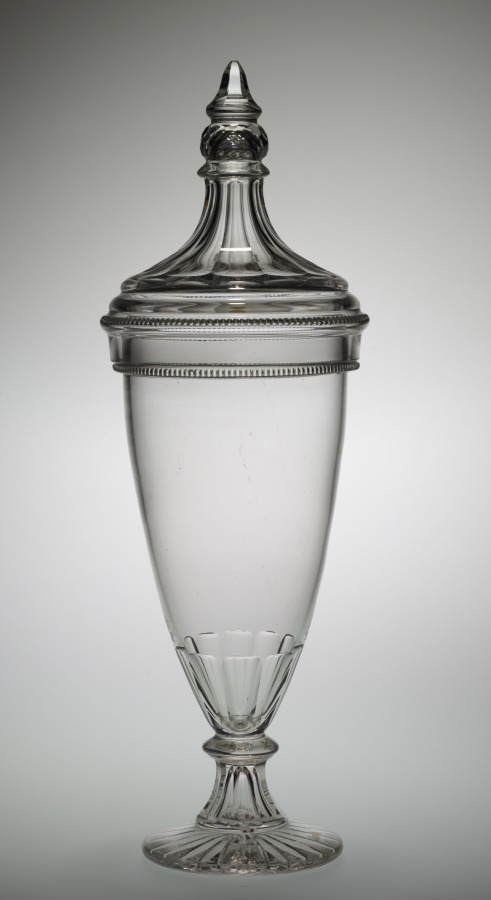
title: Candy Jar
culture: America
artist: firm of Christian Dorflinger (American, 1828–1915)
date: 1869–1880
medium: glass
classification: Glass